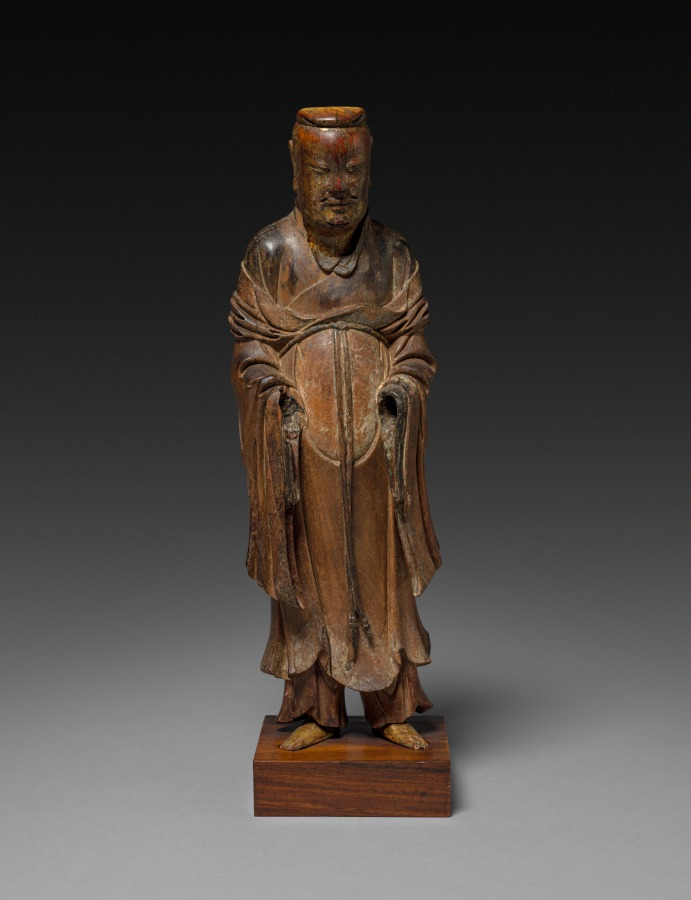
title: Daoist Figure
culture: China, Southern Song dynasty (1127-1279)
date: 1200s-1300s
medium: wood and ivory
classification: Sculpture